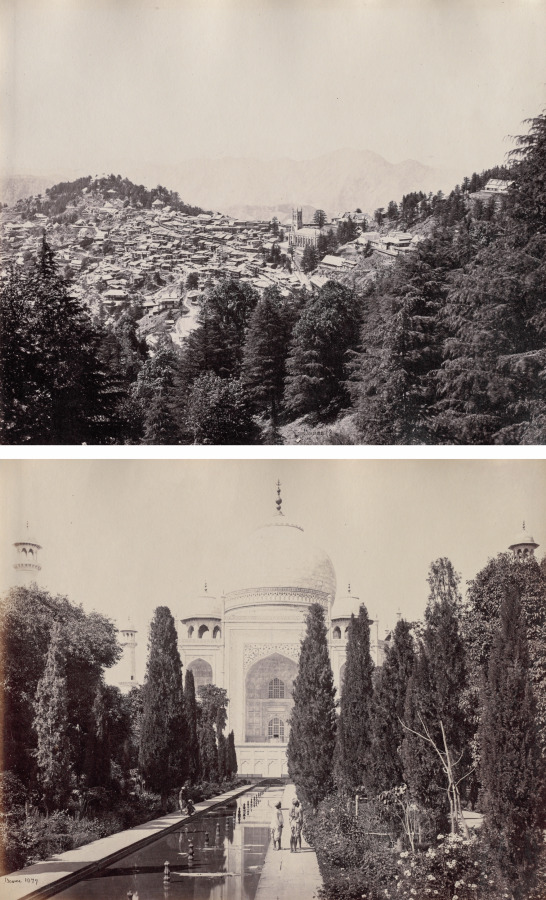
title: Shimla and the Taj Mahal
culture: India, 19th century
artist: Samuel Bourne (British, 1834–1912)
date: c. 1860s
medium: double-sided albumen print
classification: Photograph